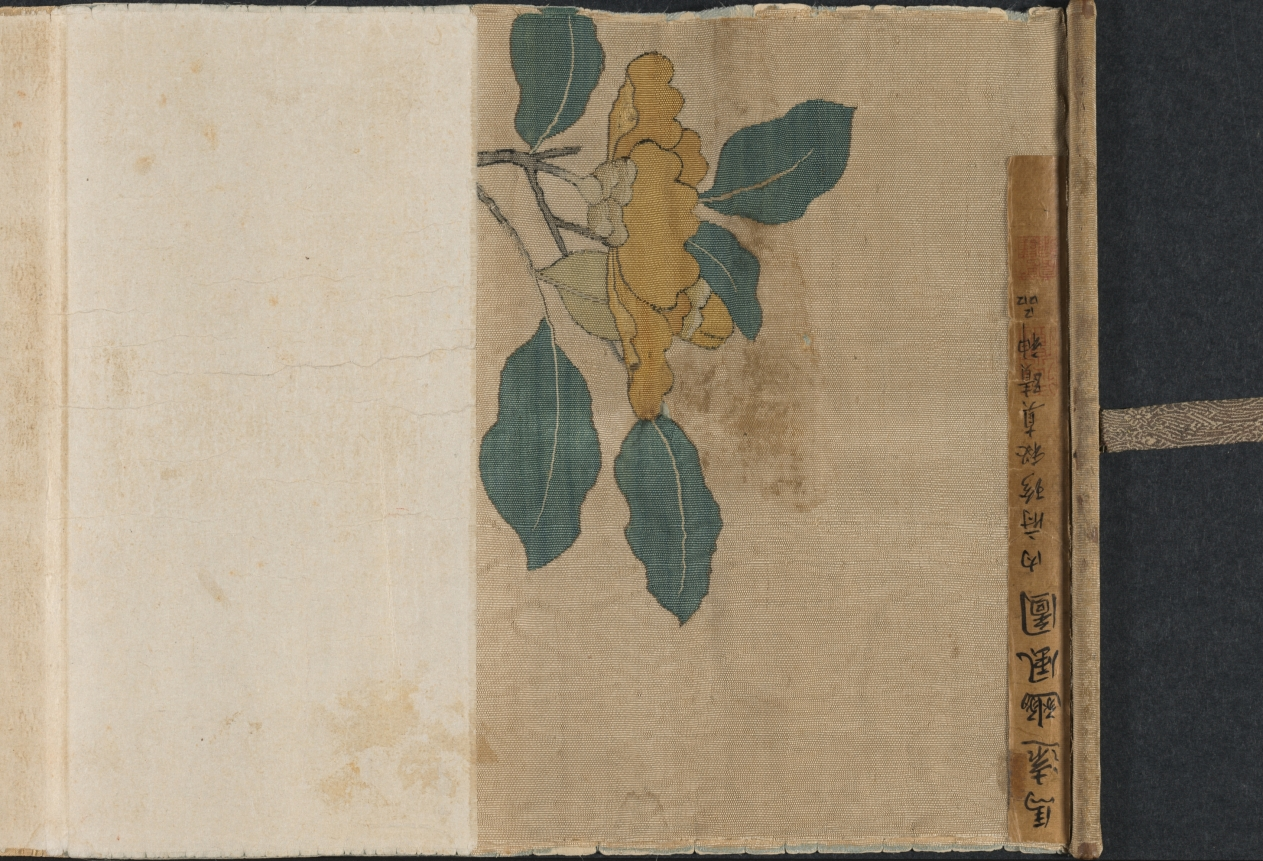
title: "Seventh Month" from the Odes of Bin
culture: China, Southern Song dynasty (1127-1279)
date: 1200s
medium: Handscroll; ink and color on silk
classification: Painting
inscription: Colophons: 1. [on the frontispiece] by the Qianlong emperor (dated 1741). 2. by Lu Wan (dated Zhengde dingchou, 1517). 2. by the Jiaqing emperor (dated 1807).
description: According to Confucian thought, the ruler looks after the well-being of his people which involves agricultural activities. Seventh Month from the ancient Odes of Bin in the Shijing (Book of Poetry) describes occupations throughout the year, including plowing, harvesting, hunting, making clothes, and observing rituals. The earliest illustrations of these Odes accompanied by text were commissioned by Southern Song emperor Gaozong (reigned 1127–1162). As the lower Yangzi delta had become the new seat of government, Gaozong had sets of these illustrations produced by court artists to revive the dynasty and convince the Confucian officialelite of his legitimacy to rule.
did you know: The Odes of Bin appears in the classic Shijing (Book of Poetry), an anthology of more than 300 poems, folk songs, and ceremonial hymns that were originally chanted to music.